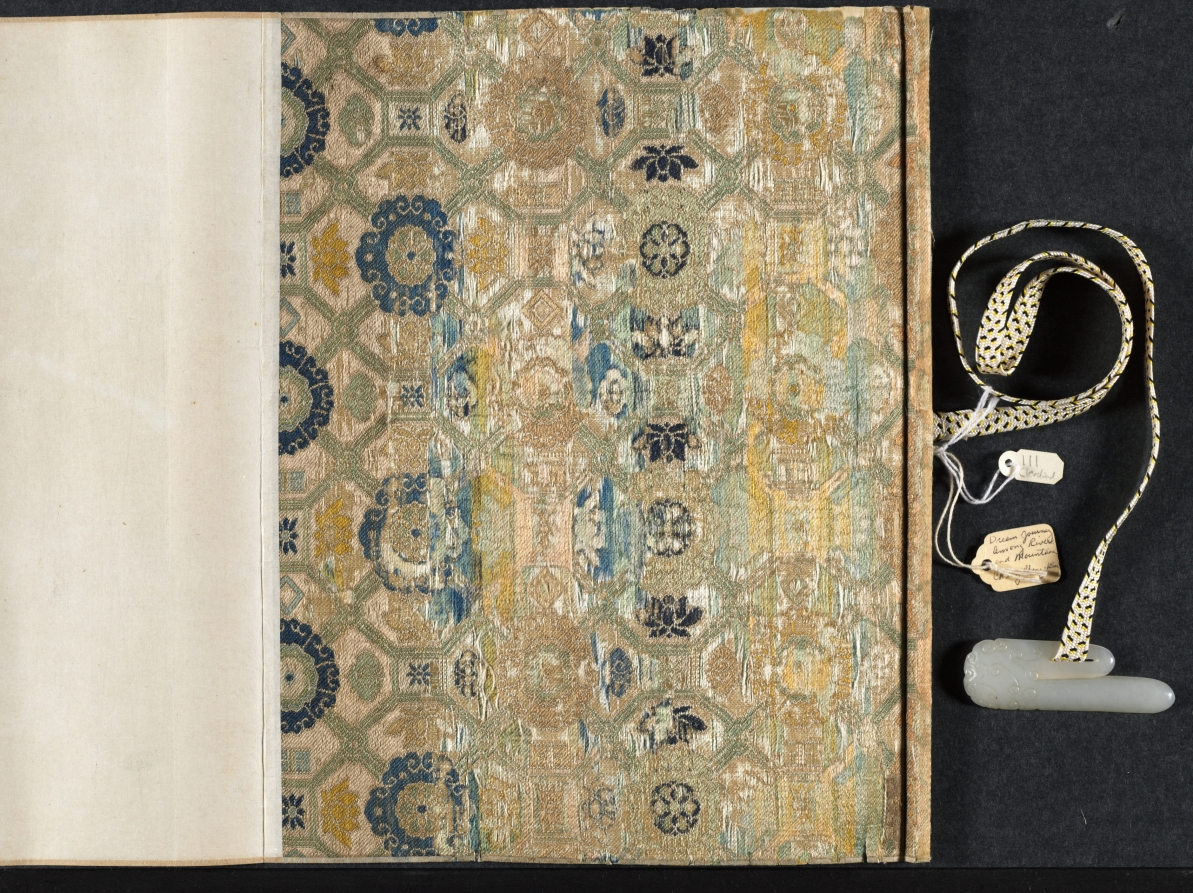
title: Dream Journey among Rivers and Mountains, no. 90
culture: China, Qing dynasty (1644-1911)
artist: Cheng Zhengkui (Chinese, 1604–1676)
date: 1658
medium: Handscroll; ink and color on paper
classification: Painting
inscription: 江山臥遊圖其九十, 青溪道人, 戊戌夏五。 [印] 程正揆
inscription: Title and inscription by Huang Yi 黃易 (1744–1802), and 3 seals.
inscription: 1 colophon and 9 additional seals: 3 seals of Dai Zhi 戴植 (active about 1821–1850); 1 colophon, dated 1914, and 3 seals of Yan Shiqing 顏世清 (1873–1929); 3 seals of Wang Nanping 王南屏 (1924–1985).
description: Cliffs and waterfalls interspersed with trees and dotted vegetation are spread over this handscroll. Long paths wind their way through villages, beside cottages, shrines, and over bridges. In the past, Chinese literati officials liked to take a “dream journey” along mountains and rivers when viewing landscape paintings in their studios. Scenery of this kind thus became a way to escape from the world of bureaucracy and administration. The painter Cheng Zhengkui used the title “Dream Journey” for a whole series of paintings, of which this is number 90. He is said to have painted 500 of them, but the actual count remains unknown.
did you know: Cheng Zhengkui planned to make 100 dream journey paintings but may have ultimately made 500.